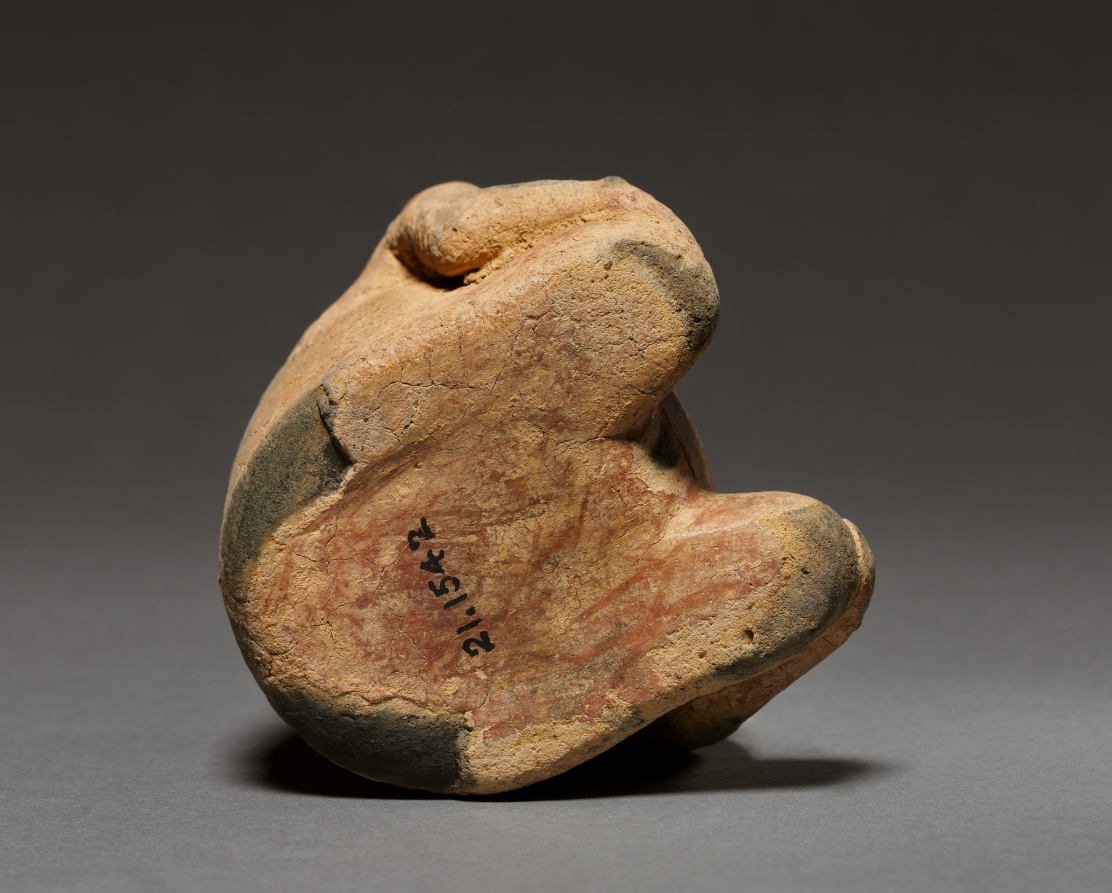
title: Figure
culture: Colombia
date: before 1550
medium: red ware with incised patterns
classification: Ceramic